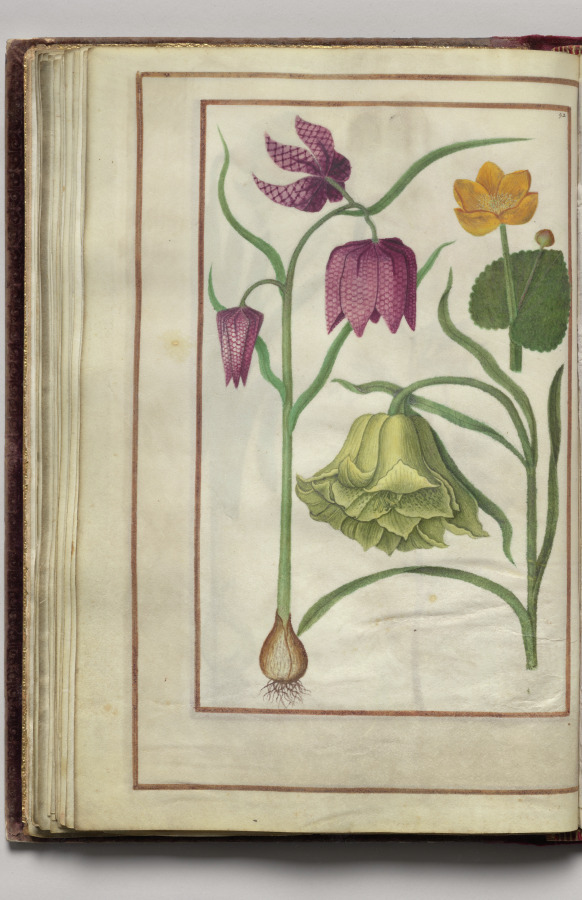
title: Fritillaria Meleagris and Ranunculus, folio 26 (verso), from Florilegium (A Book of Flower Studies)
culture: France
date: 1608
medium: watercolor, ink, silver, and gold over occasional traces of pencil, on vellum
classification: Bound Volume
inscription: Dated: Poitiers 1608 (on frontispiece) Signed: On frontispiece in black ink, lower right: Van Kuyk Notation on drawing: Frontispiece: in pencil, lower margin: * élève de Van Kessel, peintre flammand (* in pencil also appears in front of Van Kuyk's name).